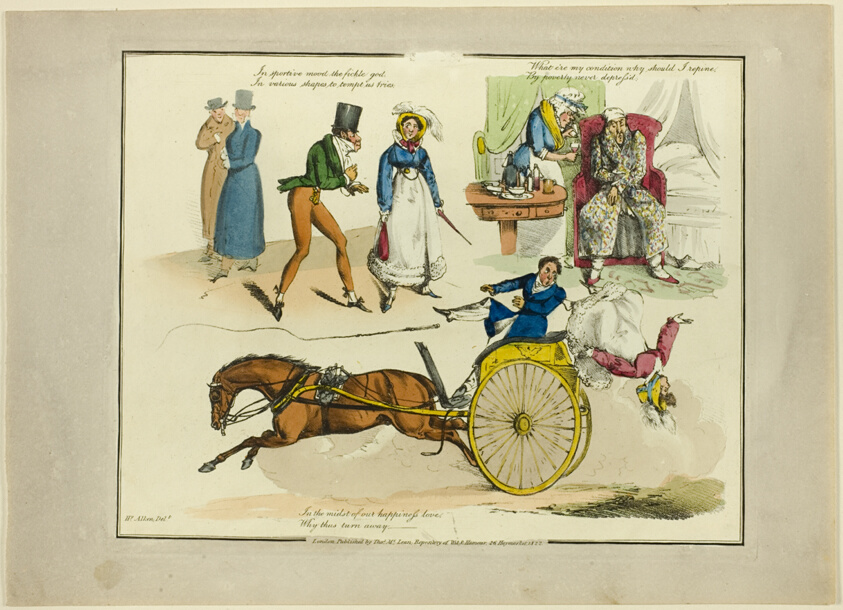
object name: Print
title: Plate from Illustrations to Popular Songs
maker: Henry Alken (English, 1785-1851); published by Thomas McLean (English, active 1790-1860)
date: 1822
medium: Soft ground etching with hand-coloring and aquatint on paper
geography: England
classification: etching; print; prints and drawing